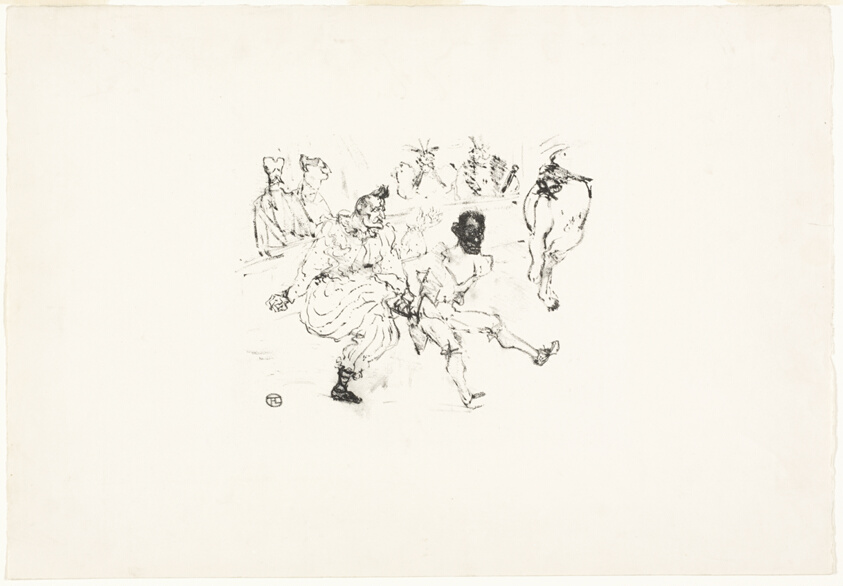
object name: Print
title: Footit and Chocolat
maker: Henri de Toulouse-Lautrec (French, 1864-1901)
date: 1894, printed 1939 or 1947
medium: Lithograph on ivory wove paper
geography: France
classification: lithograph; print; prints and drawing